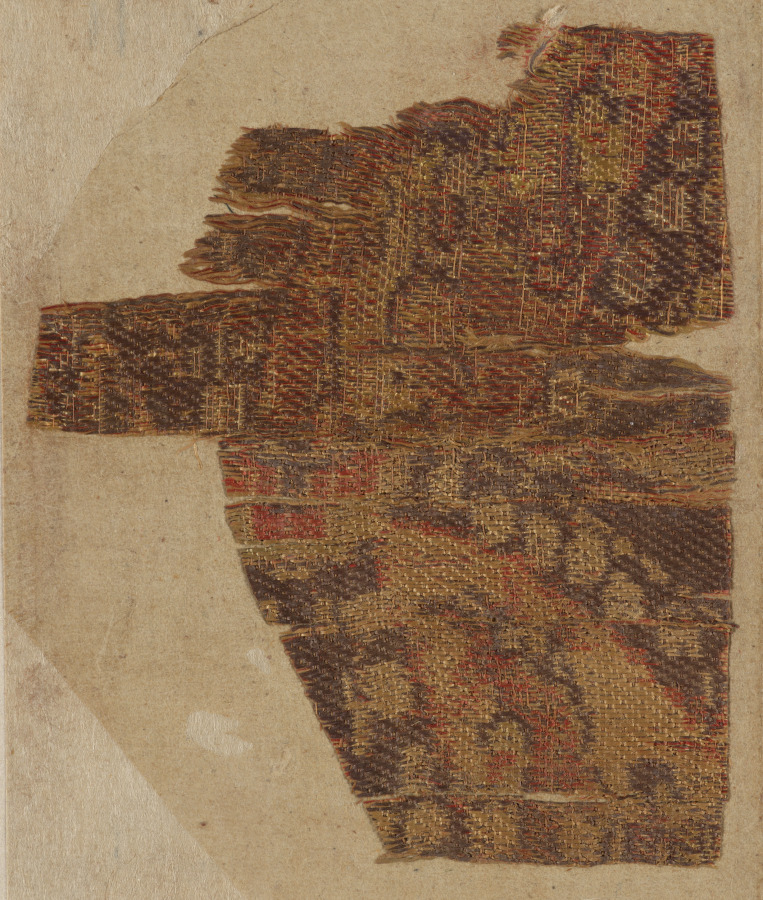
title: Fragment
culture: China or Japan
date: 700s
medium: compound twill, silk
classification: Textile